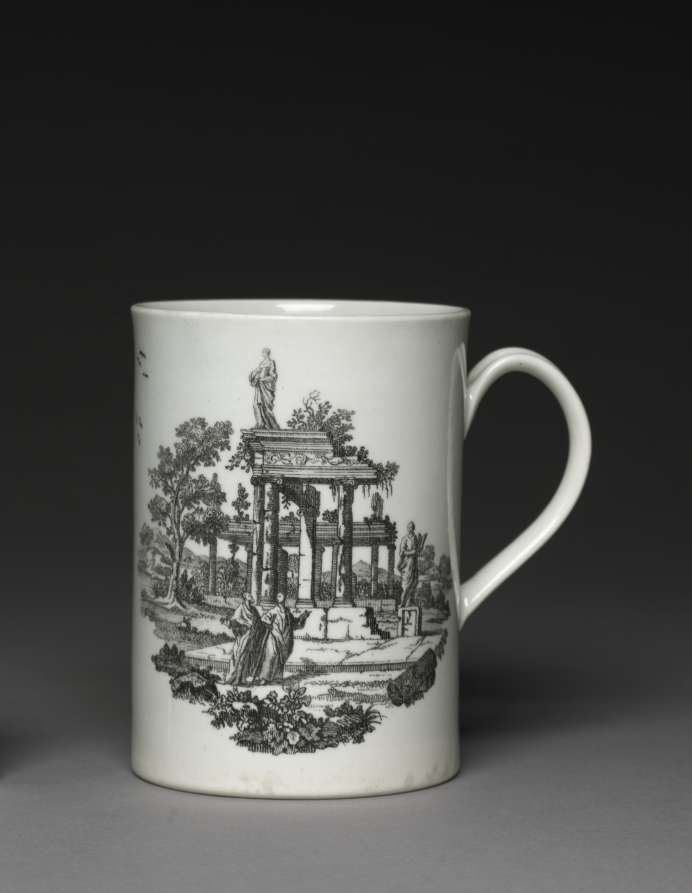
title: Mug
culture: England, Worcester, 18th century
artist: Worcester Porcelain Factory (British, established 1751)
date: c. 1760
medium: soft-paste porcelain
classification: Ceramic